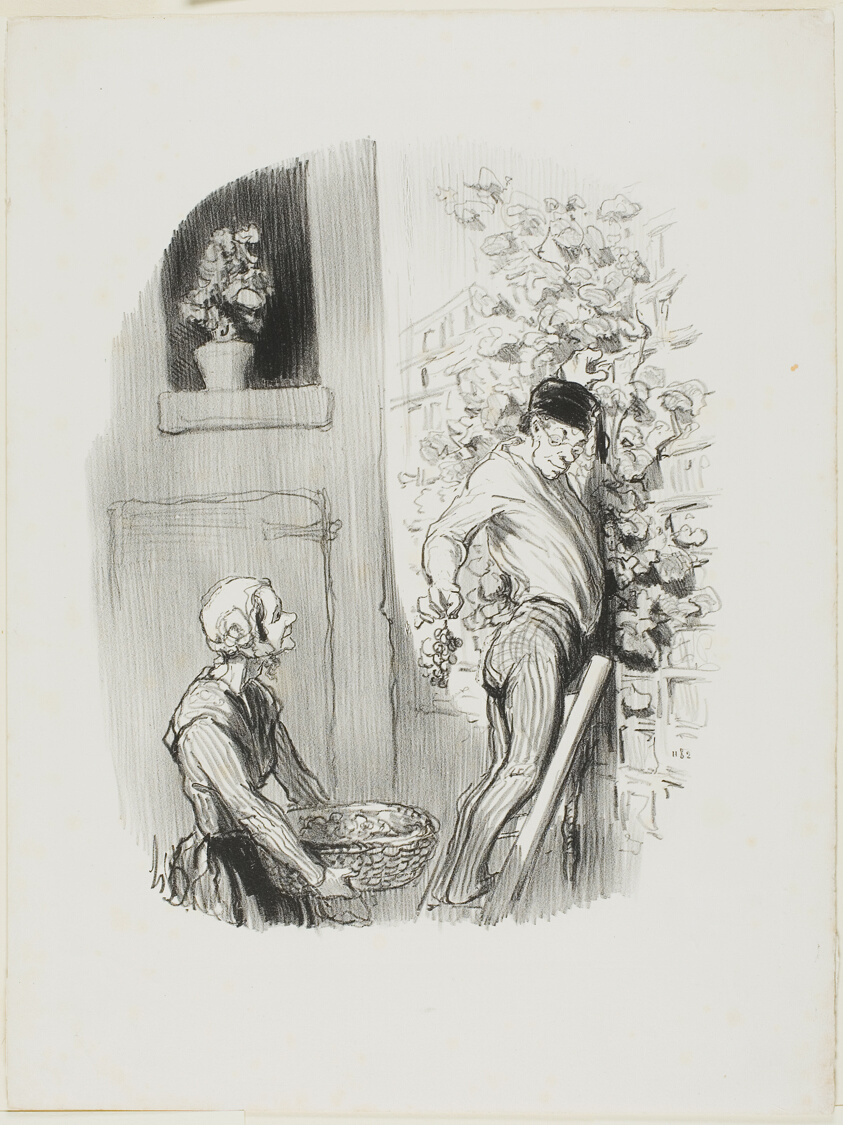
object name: Print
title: The Grape Gatherer, from Les Bons Bourgeois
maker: Honoré Victorin Daumier; French, 1808-1879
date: 1847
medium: Lithograph in black on white wove paper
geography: France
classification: lithograph; print; prints and drawing